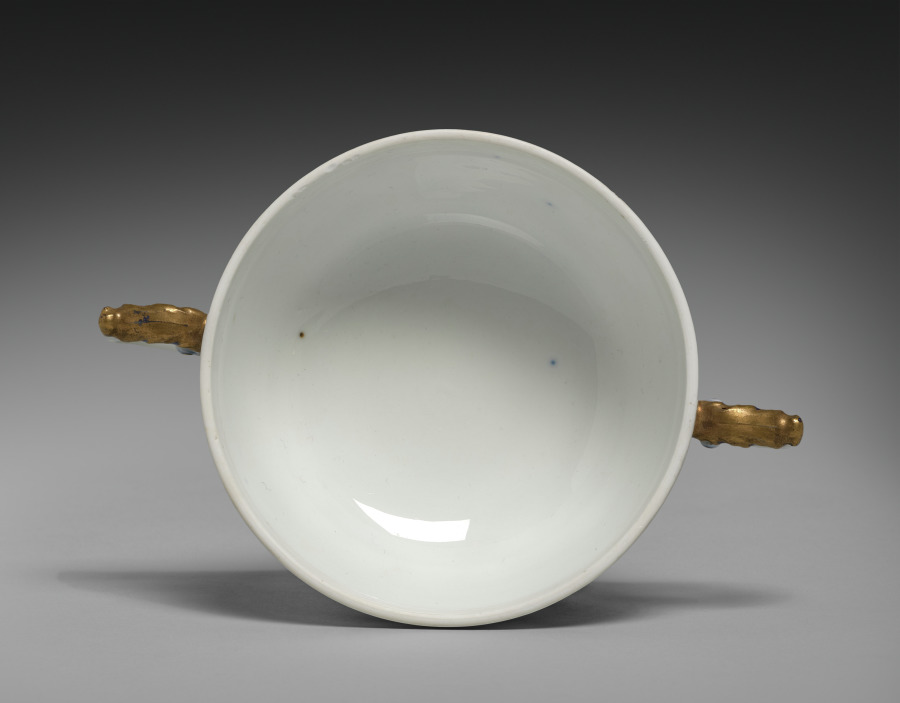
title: Broth Bowl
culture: Germany, Meissen, 18th century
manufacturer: Meissen Porcelain Factory (German, est. c. 1710)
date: 1730–40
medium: gilt porcelain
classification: Ceramic